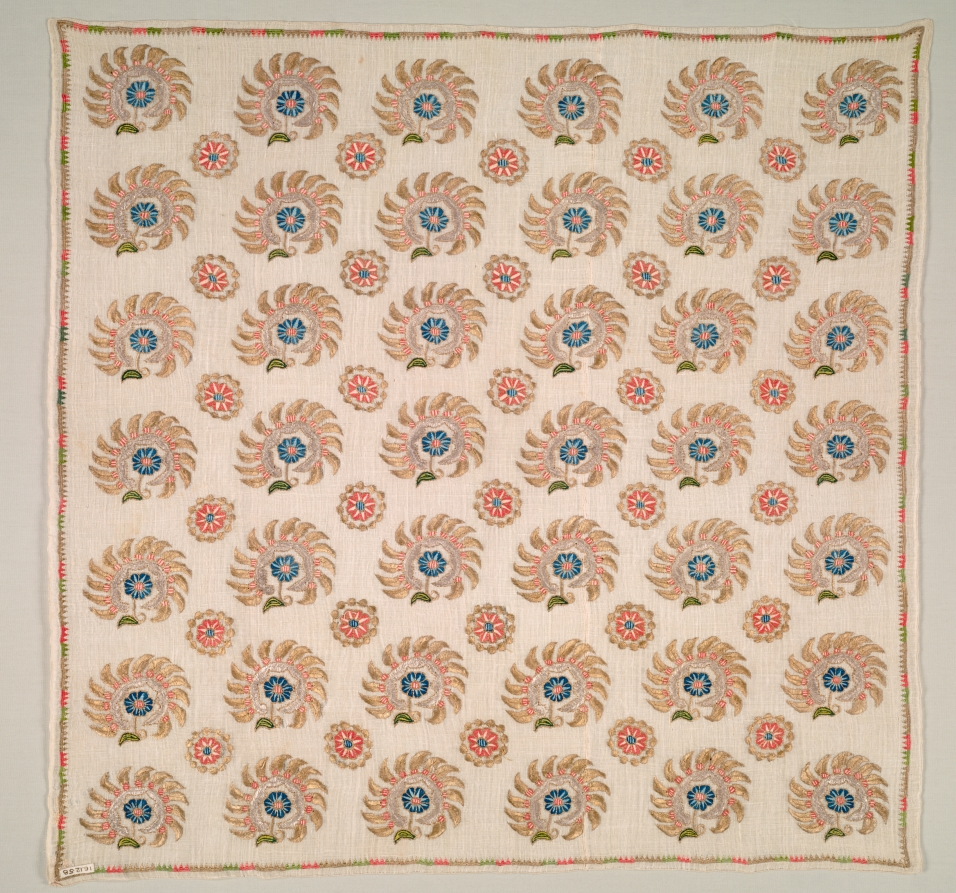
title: Embroidered Square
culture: Turkey, 19th century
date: 19th century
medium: embroidery: silk, gold and silver filé on linen tabby ground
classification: Embroidery